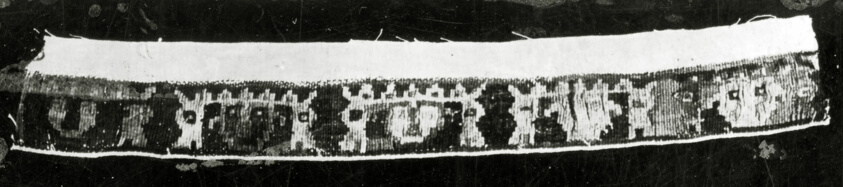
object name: Textile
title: Fragment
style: moche, andean, andes, Pre-Columbian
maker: Moche-Wari; Possibly north-central coast, Peru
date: A.D. 500/1000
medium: Slit tapestry weave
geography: Peru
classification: textile; weaving